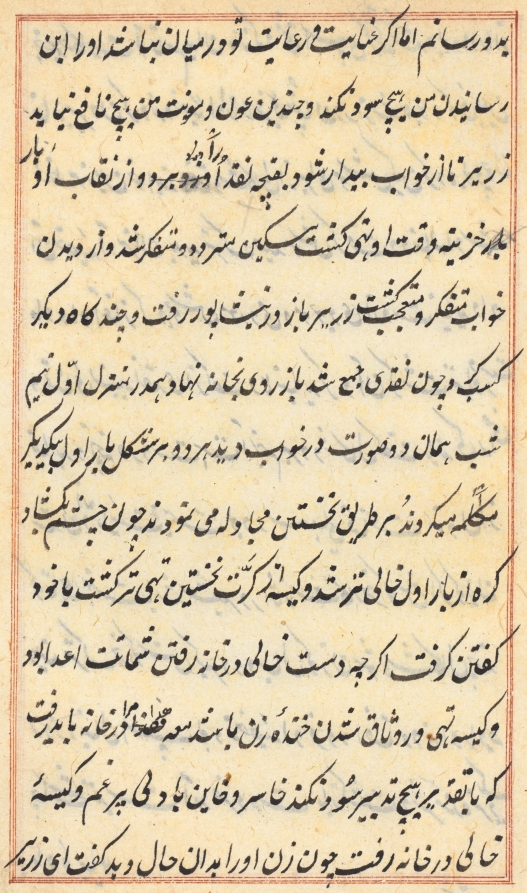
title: Page from Tales of a Parrot (Tuti-nama): text page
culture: Mughal India, court of Akbar (reigned 1556–1605)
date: c. 1560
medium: gum tempera, ink, and gold on paper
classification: Painting